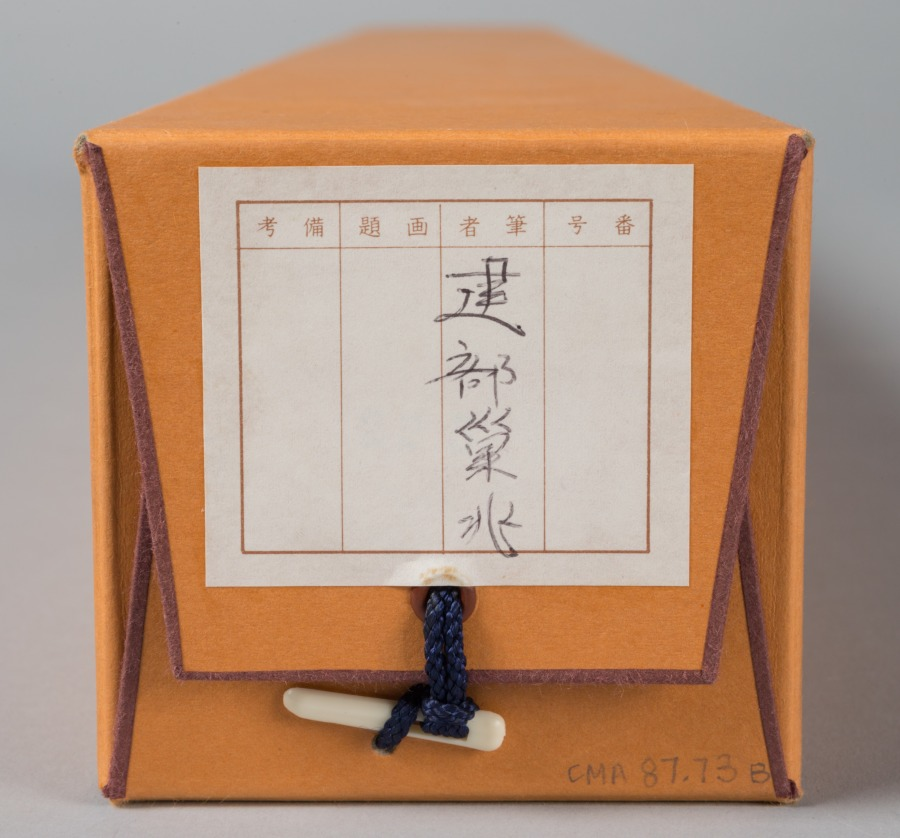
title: Genre Figures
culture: Japan, Edo period (1615–1868)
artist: Takebe Sōchō (Japanese, 1760–1814)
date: c. 1816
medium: hanging scroll; ink and color on paper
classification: Painting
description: Though rarely mentioned in official histories, Socho was an accomplished painter whose talent is readily apparent to the modern eye. For his compositions he chose traditional Japanese stories or everyday events. This painting belongs to a triptych (set of three) that was recently converted from folding screen panels to hanging scrolls.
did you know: The adult in this painting transports a small sculpted image of the fox deity Inari atop his head.